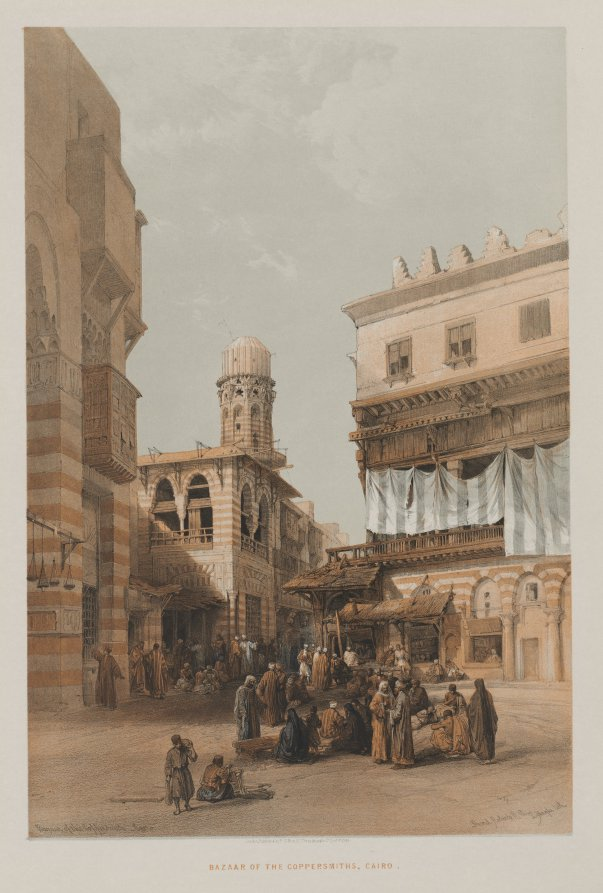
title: Egypt and Nubia, Volume III: Bazaar of the Coppersmiths, Cairo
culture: England, 19th century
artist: Louis Haghe (British, 1806–1885)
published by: F. G. Moon, 20 Threadneedle Street, London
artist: after David Roberts (Scottish, 1796–1864)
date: 1848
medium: color lithograph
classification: Print